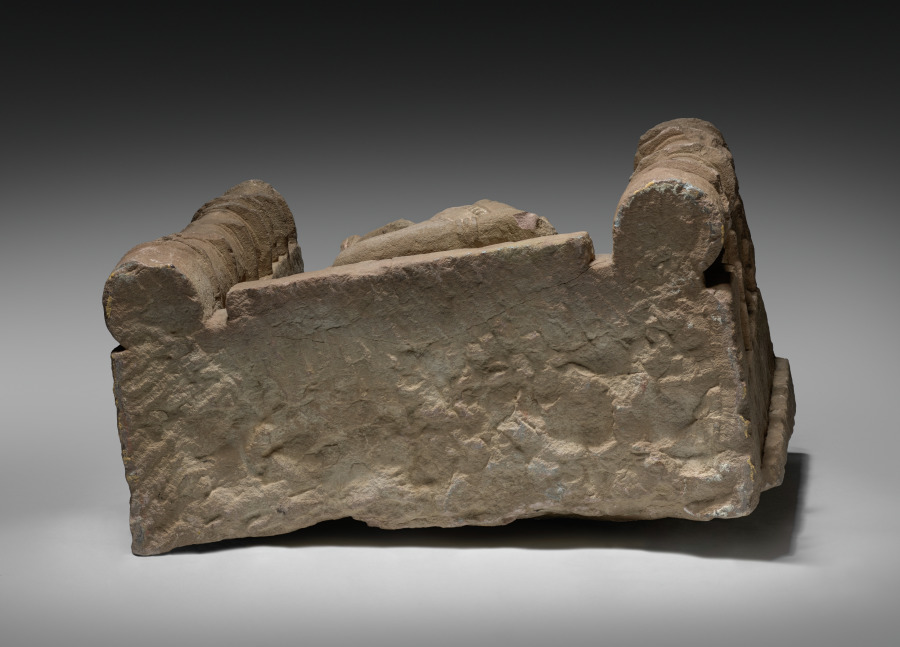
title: Eight Armed Shiva Dancing Between Two Pillars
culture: India, Rajasthan, Chandela Dynasty, 10th - 11th century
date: 900s–1000s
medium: sandstone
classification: Sculpture